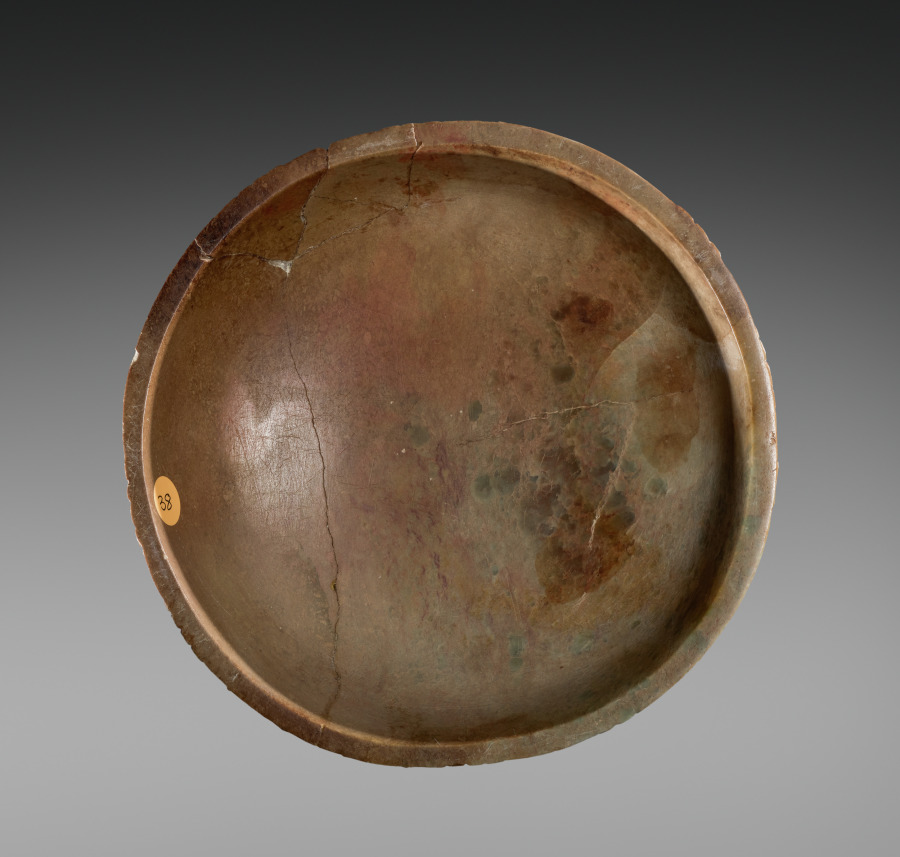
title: Plate with Supernatural Being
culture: Central Andes, north coast, probably Jequetepeque Valley, Cupisnique people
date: 900–600 BCE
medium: stone (probably steatite [soapstone])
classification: Ceramic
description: This plate is carved with a feline supernatural sacrificer who holds a severed human head in its clawed paws. The diagonal clusters of plant foliage at the figure’s shoulders and hips imply that death is tied to the earth’s fertility, one being a precondition for the other. The figure, therefore, may be an apotheosis of the life-death cycle.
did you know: The supernatural figure on this small plate may be an apotheosis of the life-death cycle.